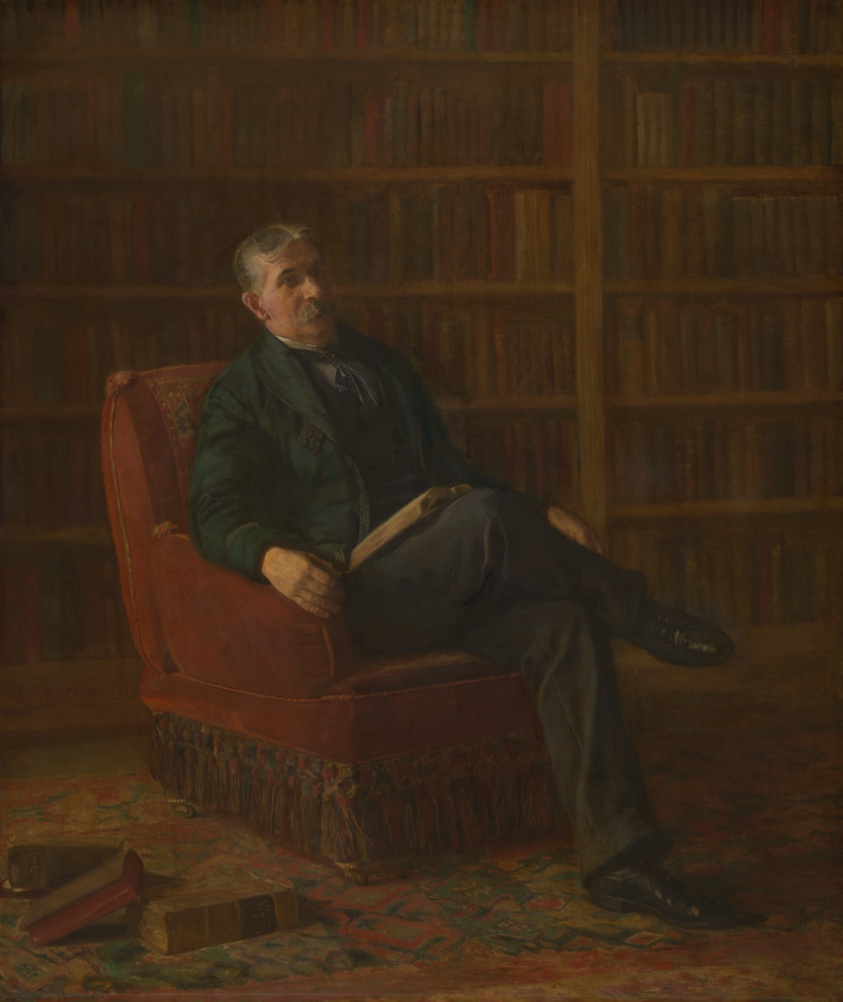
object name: Painting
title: Riter Fitzgerald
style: Realism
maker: Thomas Eakins (American, 1844–1916)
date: 1895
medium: Oil on canvas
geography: Philadelphia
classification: painting; american arts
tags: fashion, people, portraits